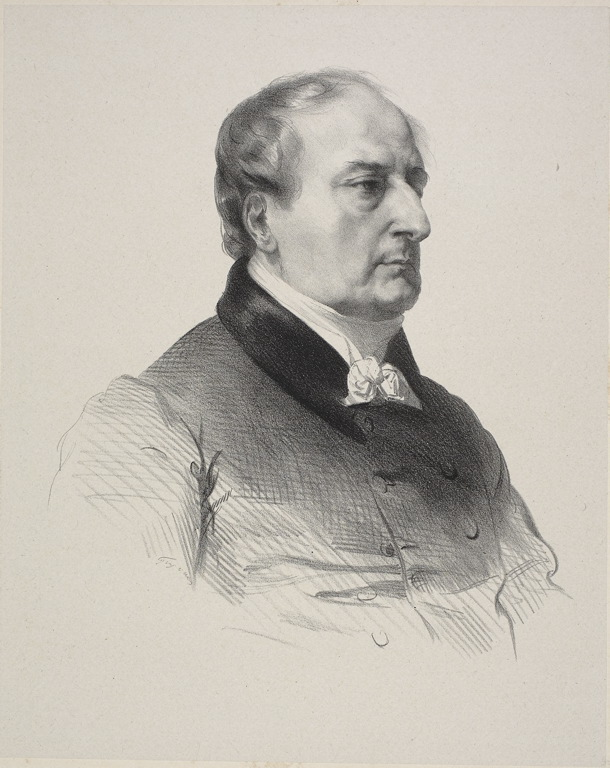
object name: Print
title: Portrait of the Painter Baron François Gérard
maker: Jean F. Gigoux; French, 1806-1894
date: before 1837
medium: Lithograph in black on light gray China paper, laid down on cream wove paper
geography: France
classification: lithograph; print; prints and drawing